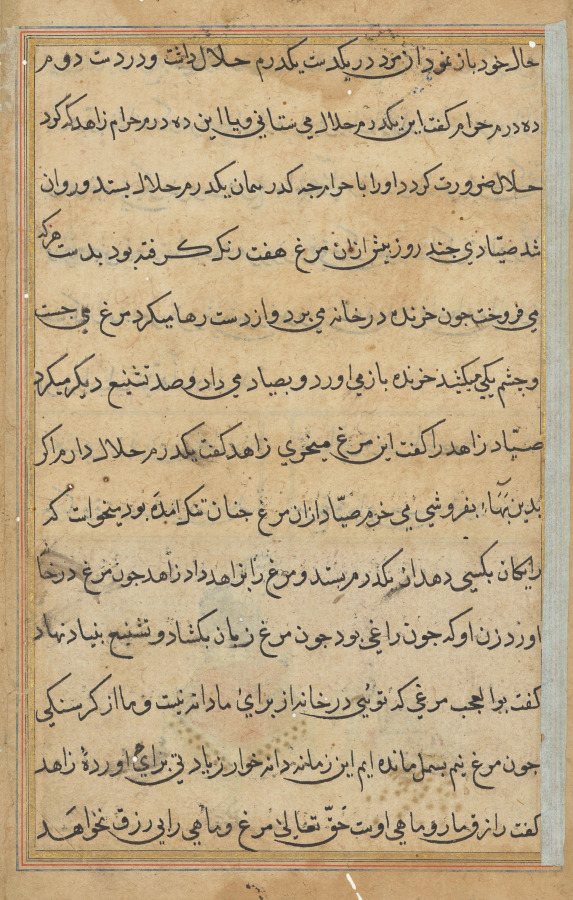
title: Page from Tales of a Parrot (Tuti-nama): text page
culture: Mughal India, court of Akbar (reigned 1556–1605)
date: c. 1560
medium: gum tempera, ink, and gold on paper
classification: Painting